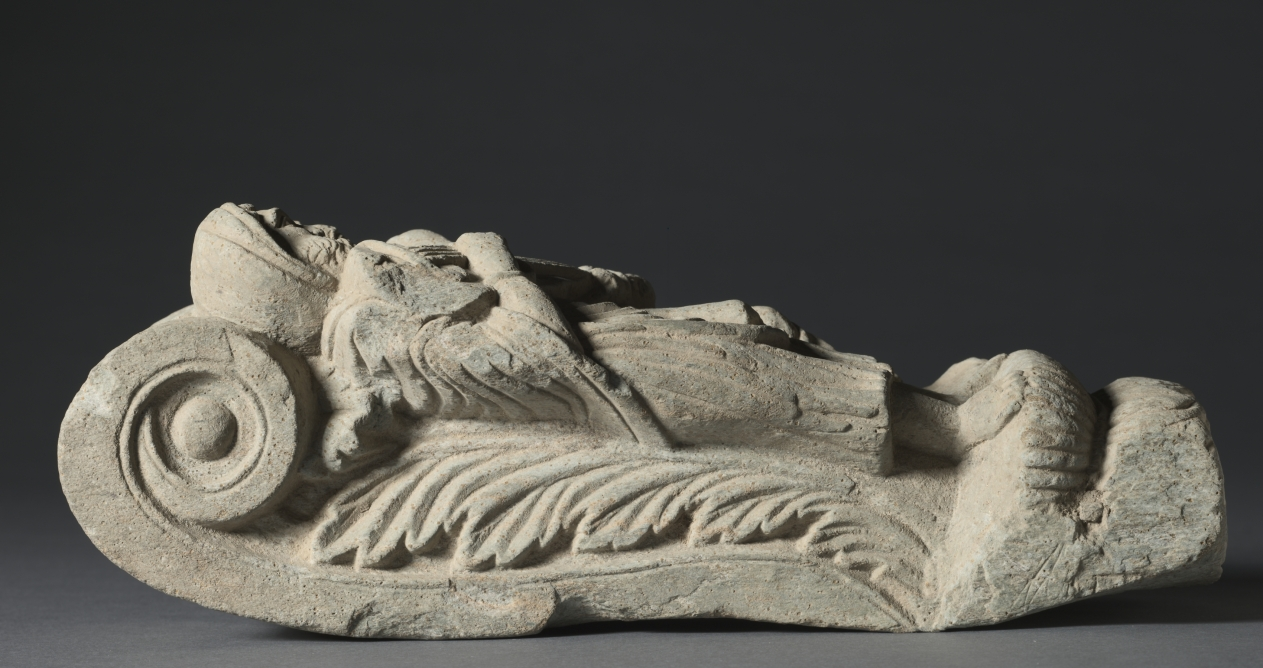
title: Bracket with Two Musicians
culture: Pakistan, Gandhara, probably Butkara in Swat, Kushan period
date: 100s CE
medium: schist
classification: Sculpture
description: This vaulted bracket, with acanthus leaves on the side, is decorated with a musician-couple who stand on a lotus pedestal. Both figures wear heavily draped robes that consist of two garments: an outer one—like the classical Greek himation—and the inner one, ankle length on the male and floor length on the female. The man's head is covered with a cap or a hood, while the young woman wears her hair pulled into a chignon and decorated with a garland. She also wears heavy earrings. The bracket or corbel of this type, originally probably placed fairly high, seems to be a particularly appropriate component for being decorated with celestial, heavenly musicians. The style is quite characteristic for the Swat area, particularly around Butkara, where Domenico Faccenna conducted extensive archaeological excavations. A number of comparable pieces, including voluted brackets, are decorated with acanthus leaves and figures of diverse types, some of which are celestial musicians who hold the same instruments. The facial types represented here are almost identical to some of the figures from Butkara.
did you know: The bearded man plays a lute-like instrument, while his companion holds a clapper-type percussion instrument similar to the kartal still used in parts of India today.